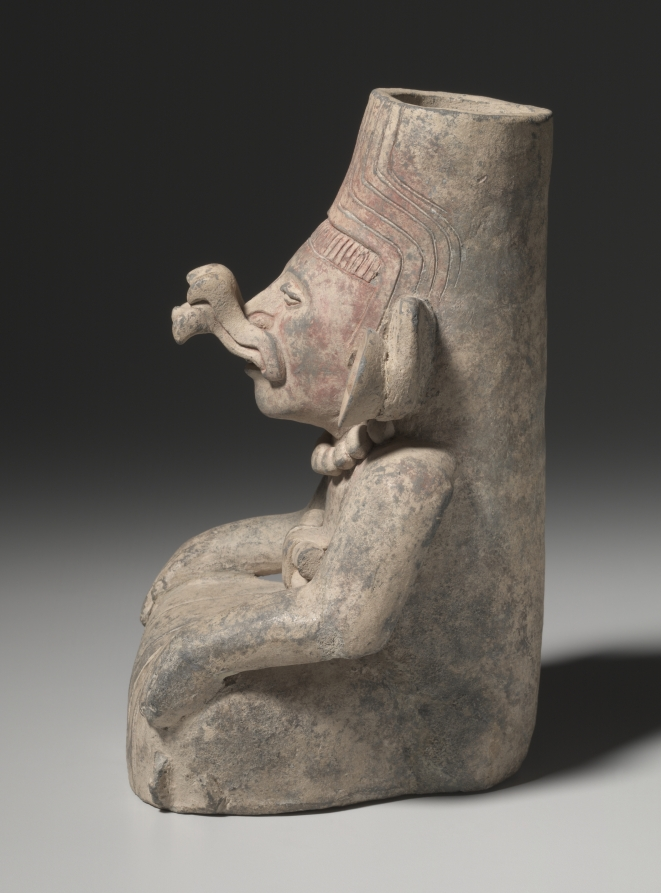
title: Urn Figure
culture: Mexico, Oaxaca, Zapotec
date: c. 200–500 CE (thermoluminescence date, 60 BCE–390 CE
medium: earthenware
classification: Sculpture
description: The figure projecting from the front of a cylindrical container wears a mouth mask perhaps shaped as a serpent’s fanged upper jaw. It probably served in a tomb as a companion to a larger, more complex figural urn. Though termed "urns," these ceramics do not contain the cremated ashes of the dead but usually are found empty.